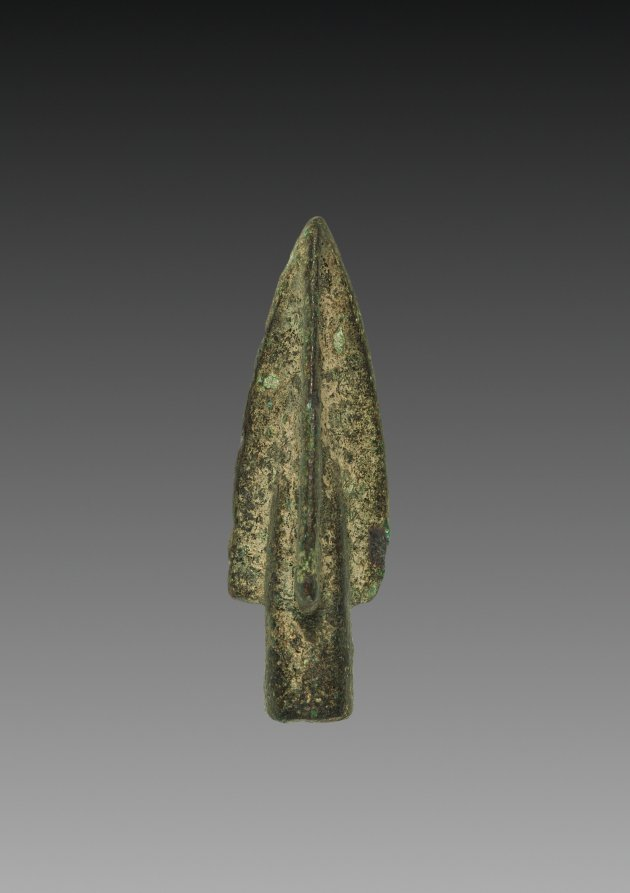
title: Arrow Point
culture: Iran, Ecbatana (?)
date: 550–330 BCE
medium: bronze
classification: Metalwork